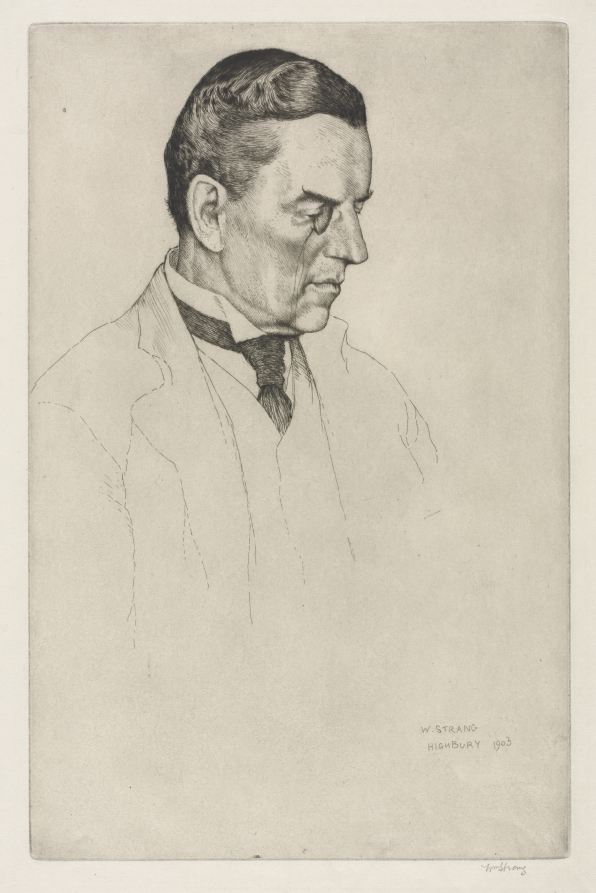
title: The Right Honorable Joseph Austen Chamberlain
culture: England, late 19th-early 20th Century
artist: William Strang (British, 1859–1921)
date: 1903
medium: etching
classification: Print